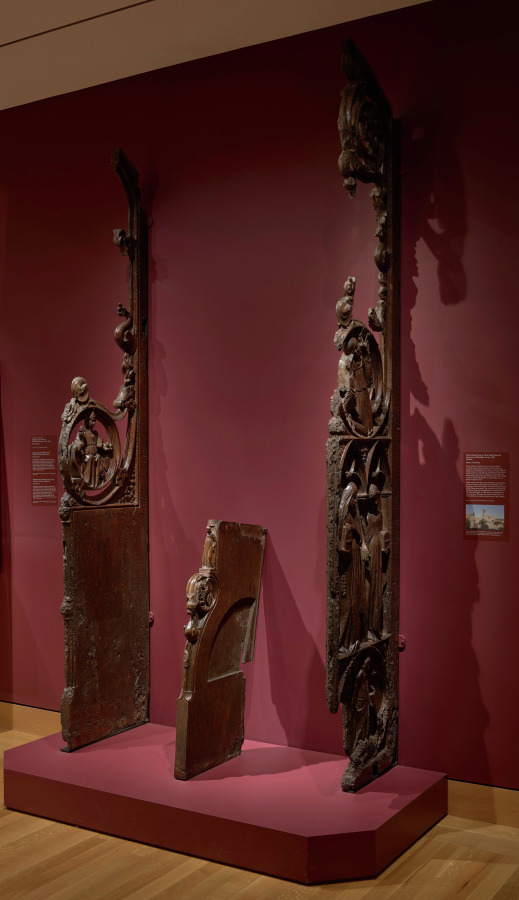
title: Pair of Panels from a Choir Stall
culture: Spain, Catalonia, Monastery of Pedralbes, 14th century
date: c. 1330–1340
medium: walnut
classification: Furniture and woodwork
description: The two larger panels-shown here in a fanciful arrangement-were probably the end panels of two stalls that faced each other across the choir of a Gothic church. The third and smaller panel originated from an interior portion of one of these stalls. The first large panel is carved with the figure of St. Francis of Assisi kneeling in prayer and receiving the stigmata. Two standing figures also appear on this panel: a nun at the left (perhaps St. Claire) and a female martyr at the right. Below is St. Michael and the dragon. The second large panel depicts a seated pope, possibly Urban IV, who holds the keys of St. Peter and a book. The small panel shows a female figure in a long gown standing on a plinth above two of the apocalyptic beasts, the winged lion of St. Mark and the winged ox of St. Luke, which are supported by a wyvern (a heraldic winged dragon). Both sides of this interior panel are intended to receive the missing seats.